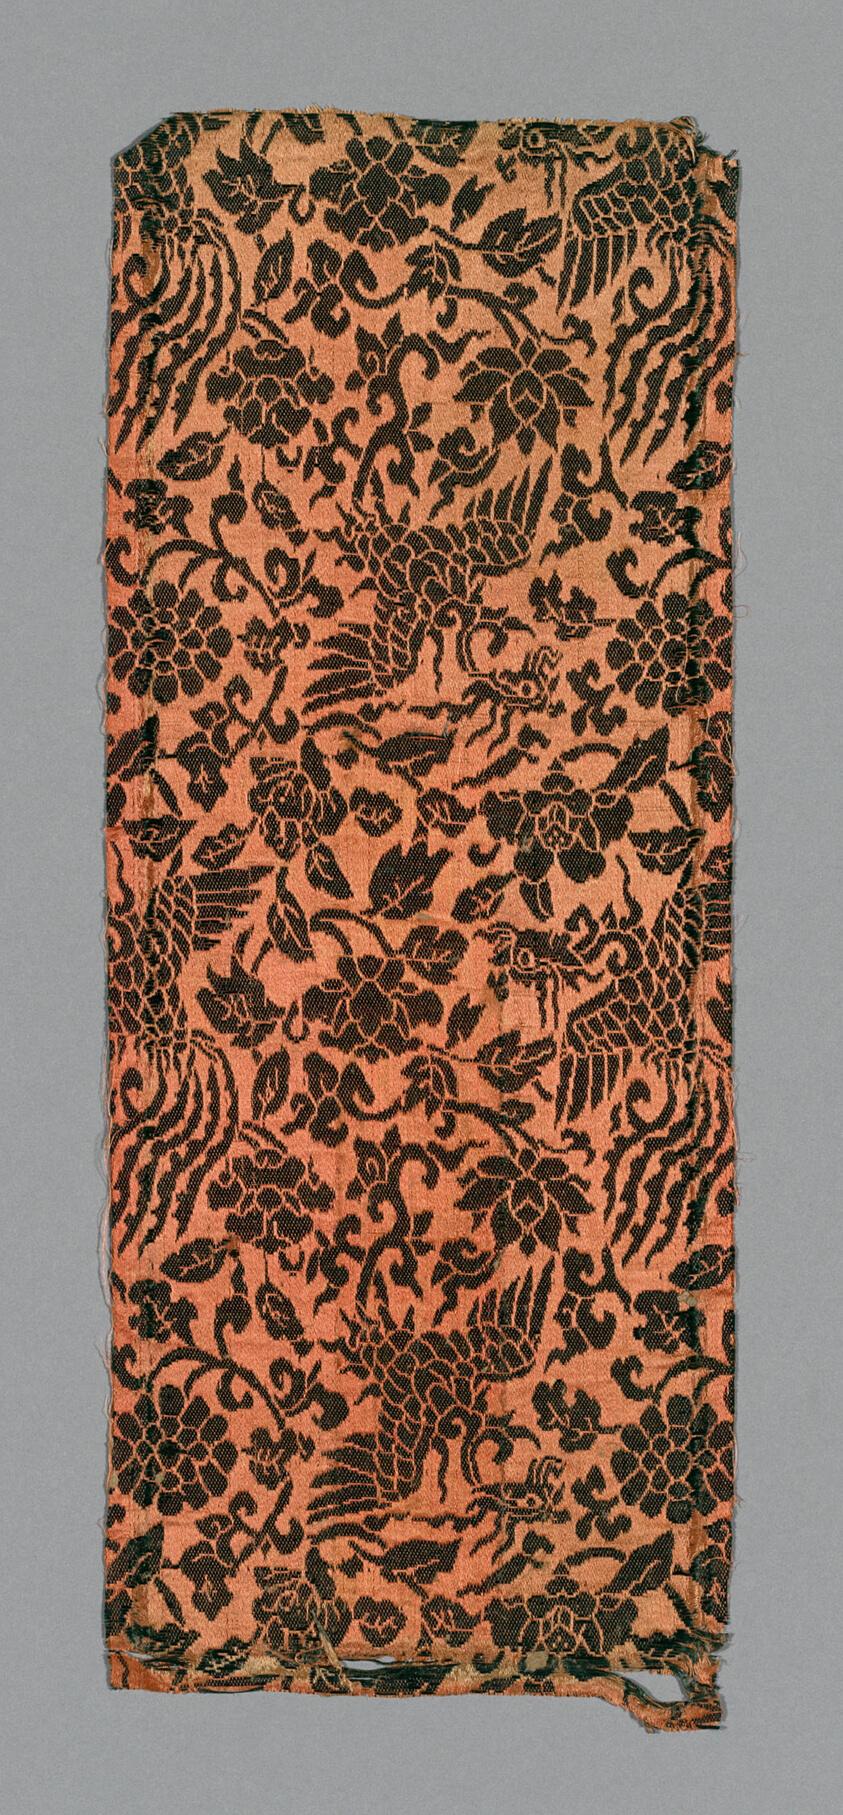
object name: Textile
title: Sutra Cover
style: ming, Chinese (culture or style), East Asian, asian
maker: China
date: Ming dynasty (1368–1644), c. 1590's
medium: Silk, warp-float faced 4:1 satin weave with supplementary patterning wefts bound in weft-float faced 1:4 satin interlacings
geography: China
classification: textile; weaving